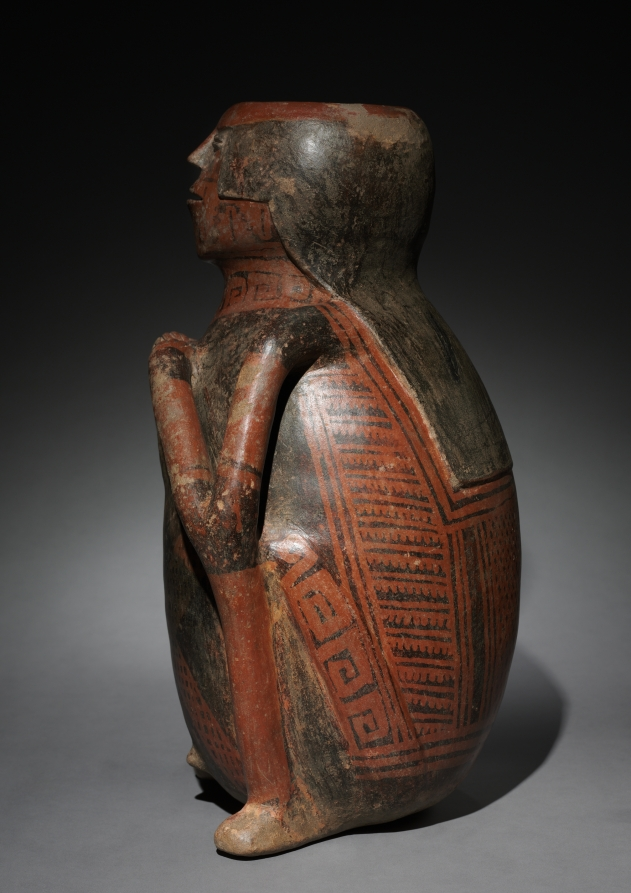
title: Anthropomorphic Vase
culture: Colombia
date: 500–1500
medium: earthenware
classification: Ceramic